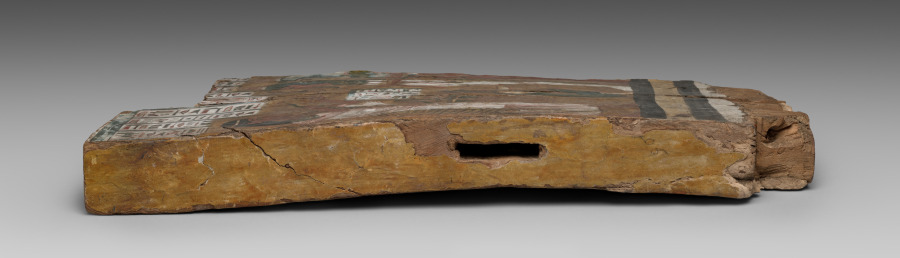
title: Side Panel from the Coffin of Amenemope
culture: Egypt, Thebes, Third Intermediate (1069–715 BCE), Dynasties 21–22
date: c. 976–889 BCE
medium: gessoed and painted sycamore fig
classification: Funerary Equipment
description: This panel illustrates one of the same scenes shown on the inside of Nesykhonsu’s coffin, allowing us to compare different artist’s styles. On the right stand the mummies of the priest Amenemope and his wife, Taditkhonsu. Their daughter, called "the lady of the house, Mutemperes," crouches before them with her hands wrapped around Amenenope’s legs in a traditional gesture of mourning. On the left, a priest, dressed in his finest linen garments and panther skin, holds in his upraised hands an incense burner and a curious curved implement typically associated with the "opening of the mouth" ritual, in which the mummy’s mouth was magically opened so that the deceased person could take in food and thus be brought back to life.